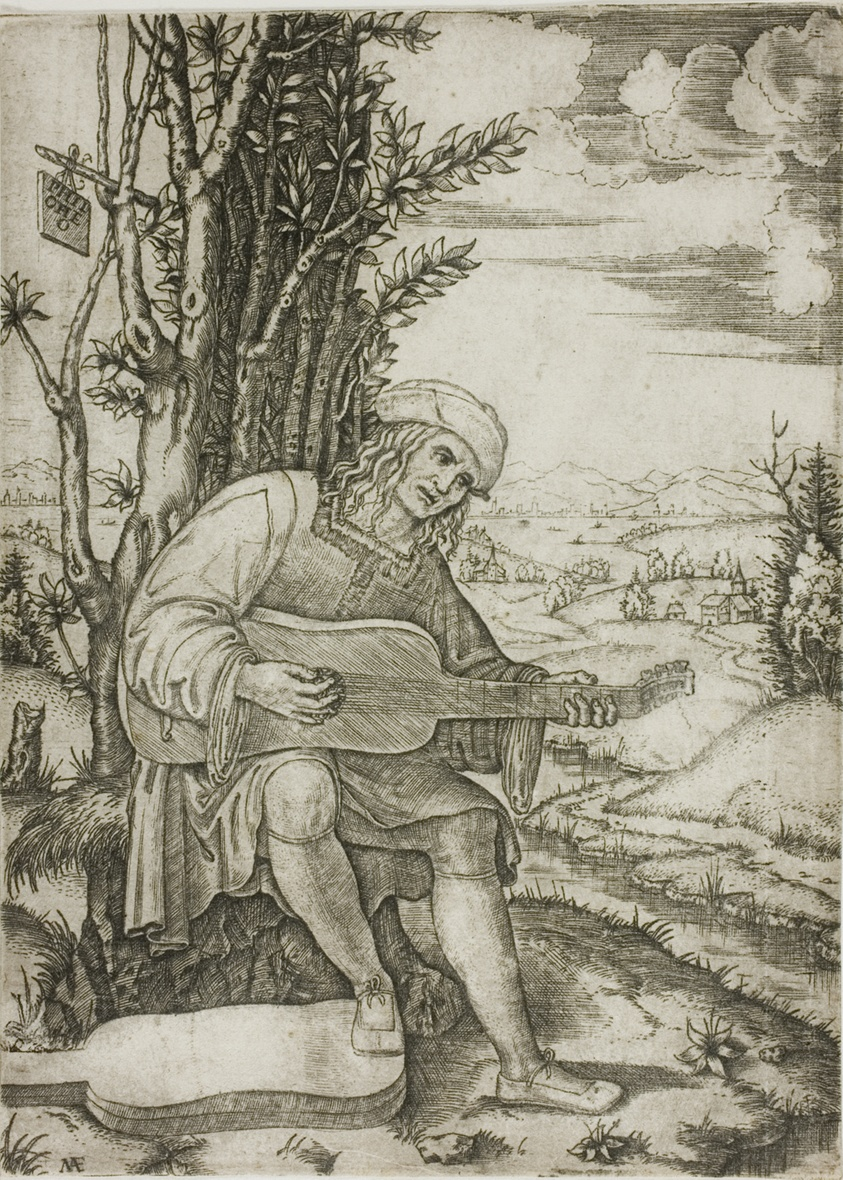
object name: Print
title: Giovanni Filoteo Achillini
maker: Marcantonio Raimondi (Italian, c. 1480-1534)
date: c. 1509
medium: Engraving on paper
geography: Italy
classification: engraving; print; prints and drawing